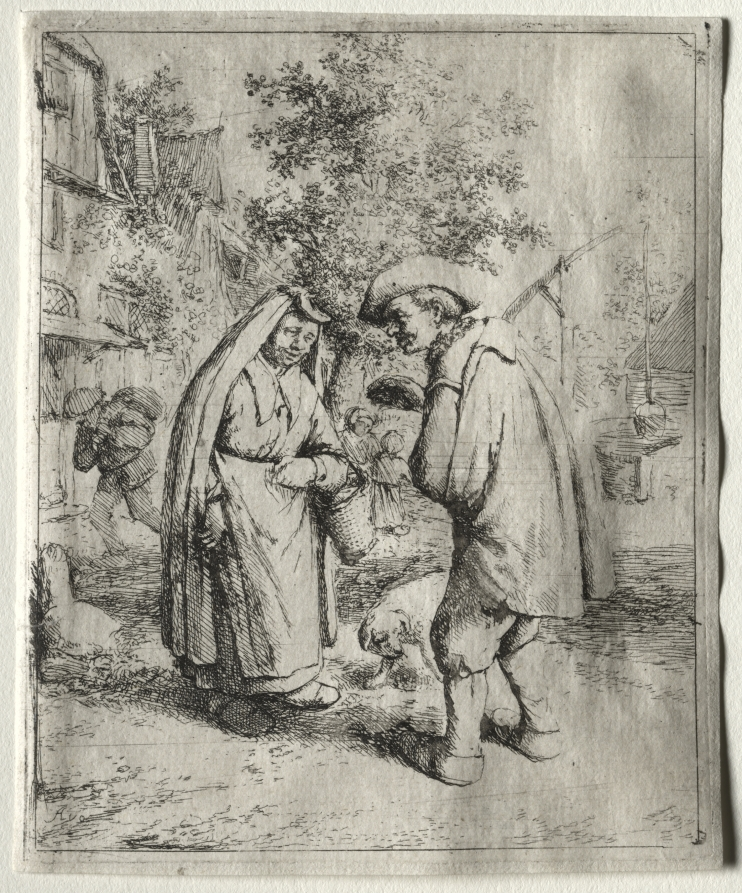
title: Man Conversing with a Woman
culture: Netherlands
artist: Adriaen van Ostade (Dutch, 1610–1684)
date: c. 1648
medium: etching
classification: Print